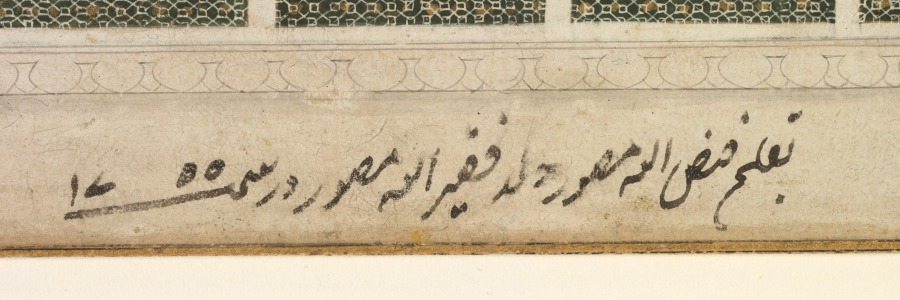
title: A blindfolded suitor is brought before a princess (recto)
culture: India, Lucknow, Mughal, 18th century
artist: Fayzullah (Indian, active c. 1730–1765)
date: 1755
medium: Gum tempera and gold on paper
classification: Painting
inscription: signed in two places: on capital of central pillar: 'amal - i Fayzullah ("the workof Fayzullah"), and below: bi - qalam i Fayzullah Musavvir walad - i Faqirullah Musavvir dar sanna 1755 ("by the pen of Fayazullah the painter son of Faqirullah the painter in the the year 1755")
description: In a scene set on a carpeted terrace in the women’s palace quarters, an older woman of the harem drags a young prince with a white blindfold over his eyes before a princess grasping a document. Such a scene evokes a literary allusion of a princess who selects her suitor, but it also resonates with circumstances at the Mughal court. Signed and dated by the artist, this painting was completed at a time when powerful women wielded control over the emperor, and Ahmad Shah Bahadur (reigned 1748–54), son and successor of Muhammad Shah, had been blinded and deposed less than one year before.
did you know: A gigantic crocodile swallows a horse and rider attempting to cross the river.